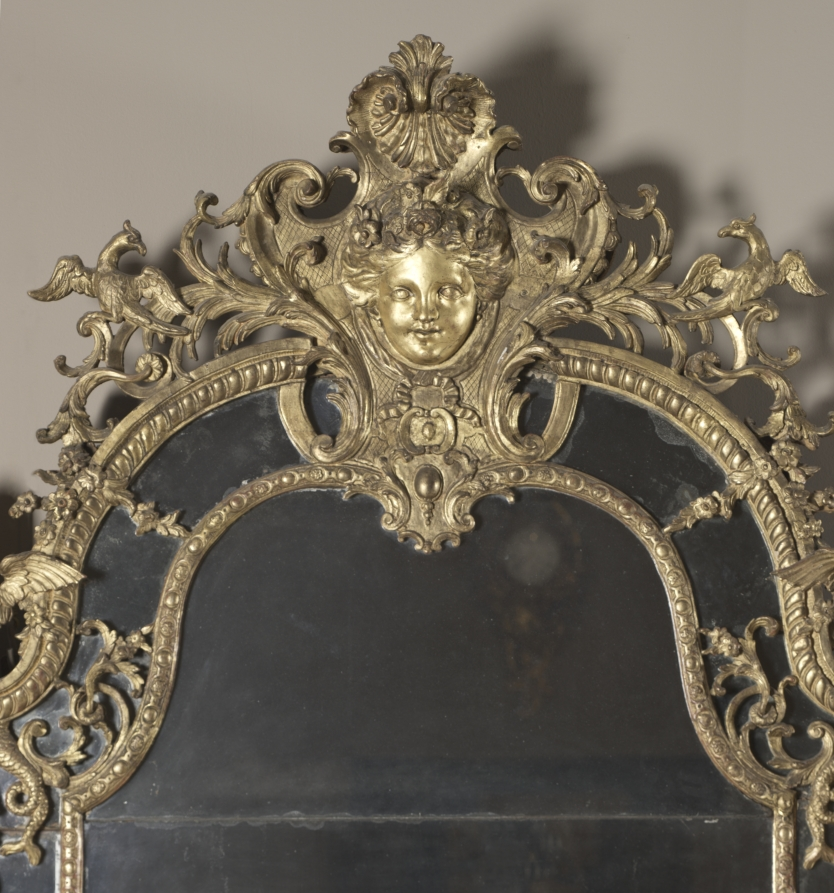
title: Wall Mirror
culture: France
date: c. 1720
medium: carved and gilded wood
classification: Furniture and woodwork